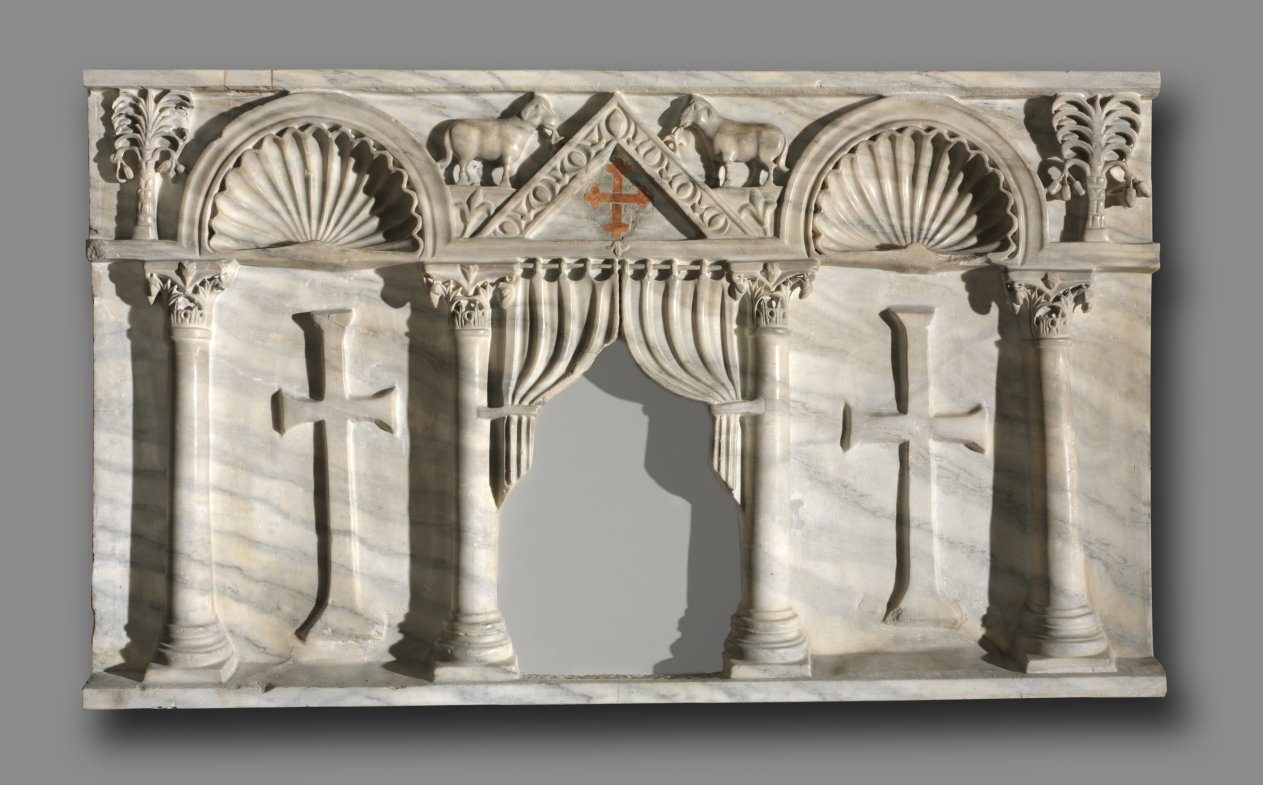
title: Altar Front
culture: early Byzantium, Constantinople or Ravenna, Byzantine period, 6th century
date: c. 540–600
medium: marble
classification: Sculpture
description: This carved marble panel resembles the front of an Early Byzantine sarcophagus, or coffin. While its decoration is typical of those produced in the Italian city of Ravenna during the 500s, its size is considerably smaller, indicating that the panel may instead have been made as an altar front. It is likely that the small window between the center columns with its opened curtains once allowed the faithful to contemplate a precious reliquary placed inside. The decorative repertoire of the panel includes both architectural forms--arches, pediments, and columns--and a number of symbols commonly found in Early Christian art including scallop shells, lambs, palms, and crosses that represent the concepts of life, the sacrifice of Christ, victory over death, and eternal life.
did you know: This marble altar was likely in a Byzantine church that was opulently decorated with mosaics, rich textiles, and gilded lamps. Worshipers would have witnessed the rituals of faith that occurred at the altar, enshrined behind a barrier called a templon, and accessible only to the clergy.